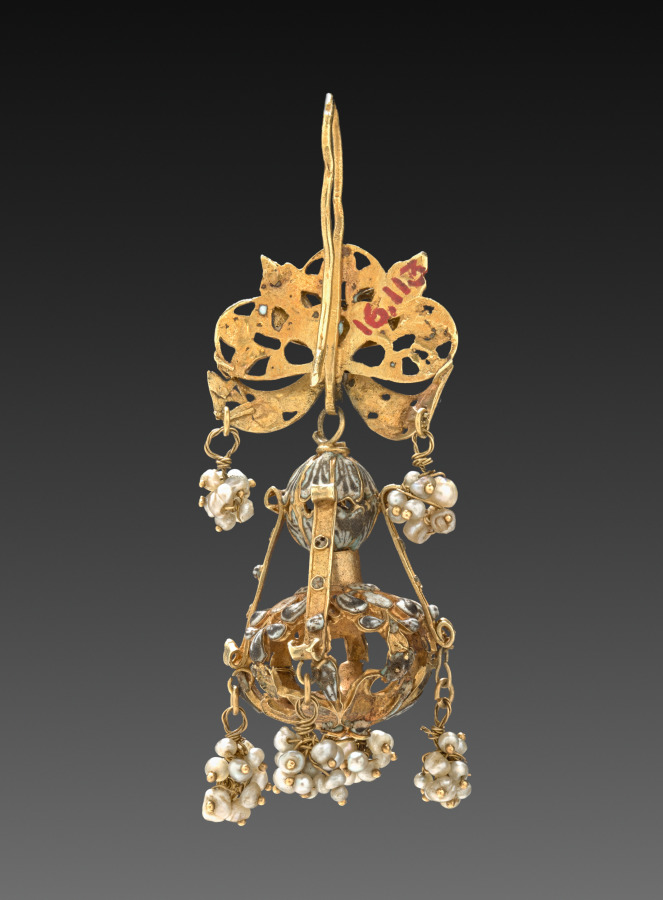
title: Earring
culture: Italy, Sicily, 18th-19th century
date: 1700s - 1800s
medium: gold and enamel with pearls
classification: Jewelry